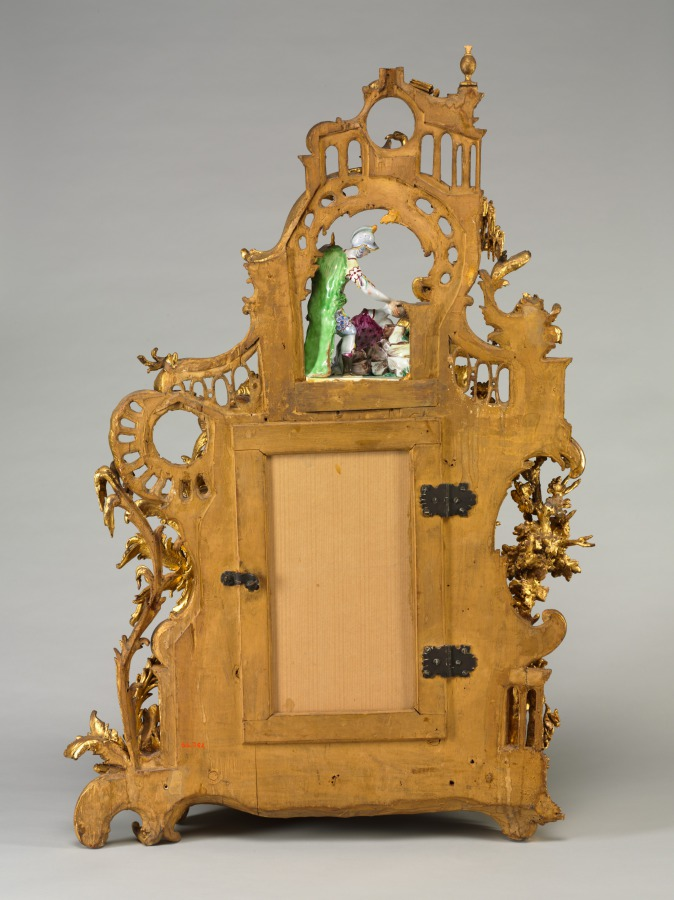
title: Clock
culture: Germany, 18th century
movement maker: Baumgartinger (German)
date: c. 1750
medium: carved and gilded wood, faience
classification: Furniture and woodwork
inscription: inscribed on face: Baumgartnger [sic] Mergentheim.